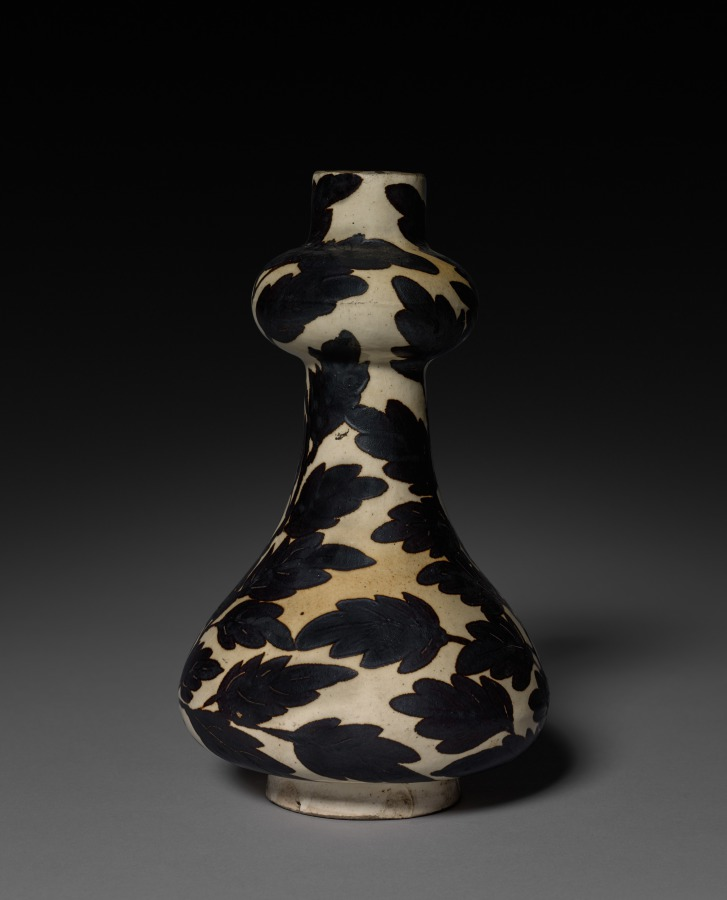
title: Gourd-shaped Vase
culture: China, Ming dynasty (1368–1644)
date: 1368–1644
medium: porcelain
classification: Ceramic